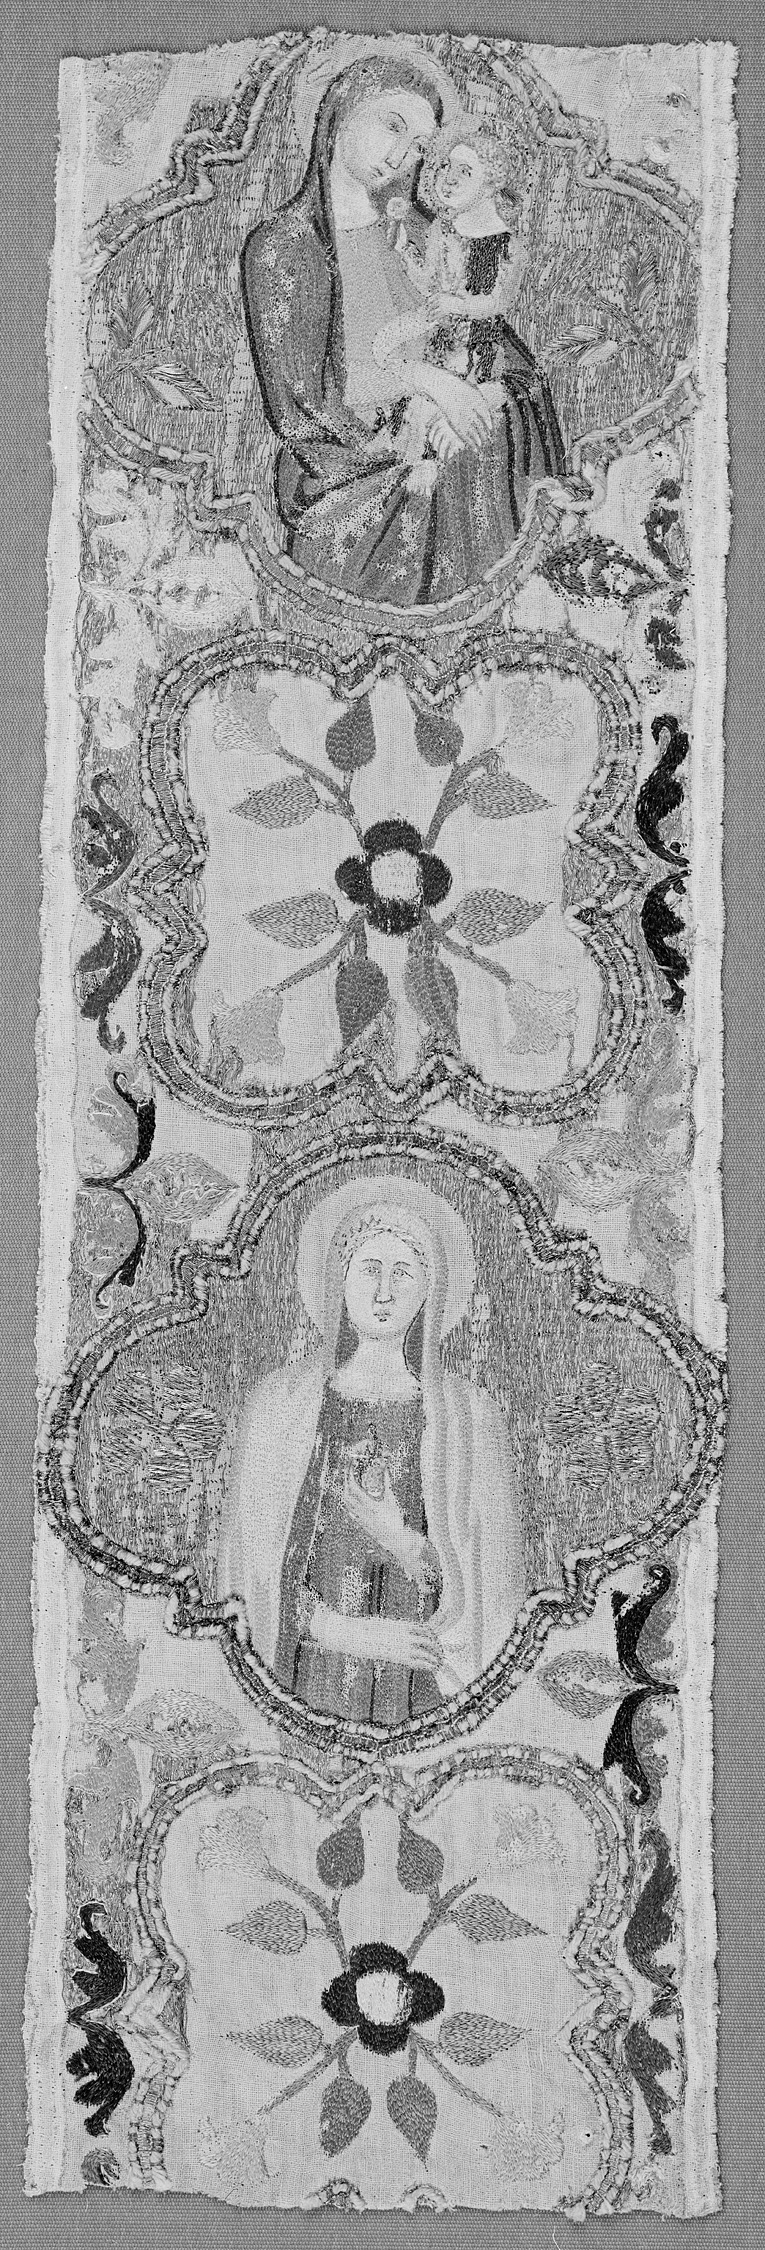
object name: Textile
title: Fragment (From an Orphrey Band)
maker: Possibly after work by Naddo Ceccharelli (Italian, active 14th century); Sienna, Italy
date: 14th century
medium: Linen, plain weave; embroidered with silk and gilt- and silvered-metal-strip-wrapped silk in bullion, satin and split stitches; couching and padded couching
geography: Italy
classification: textile; needlework (visual works); liturgical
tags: vestments